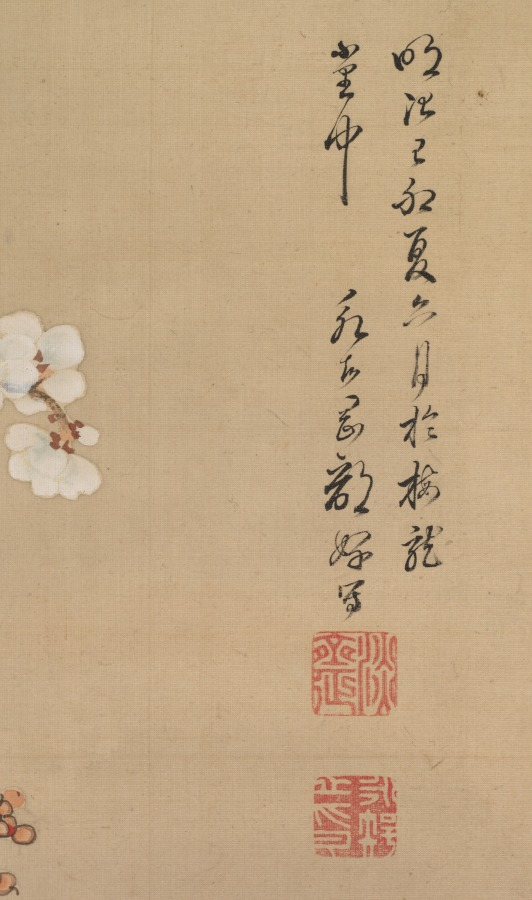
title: Vase of Flowers with Grasshopper, Marine Life, and Garden Rock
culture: Japan, Meiji period (1868–1912)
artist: Okabe Ko (Japanese)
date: late 1800s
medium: hanging scroll; ink and color on silk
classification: Painting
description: A great interest in Western scientific studies developed in Japan during the late Edo period (1615-1868) and into the Meiji era (1868-1912). One outcome of this phenomenon in the visual arts was the detailed portrayal of plant, animal, and marine life. This painting is an assemblage of objects carefully observed from nature, but not usually seen together.